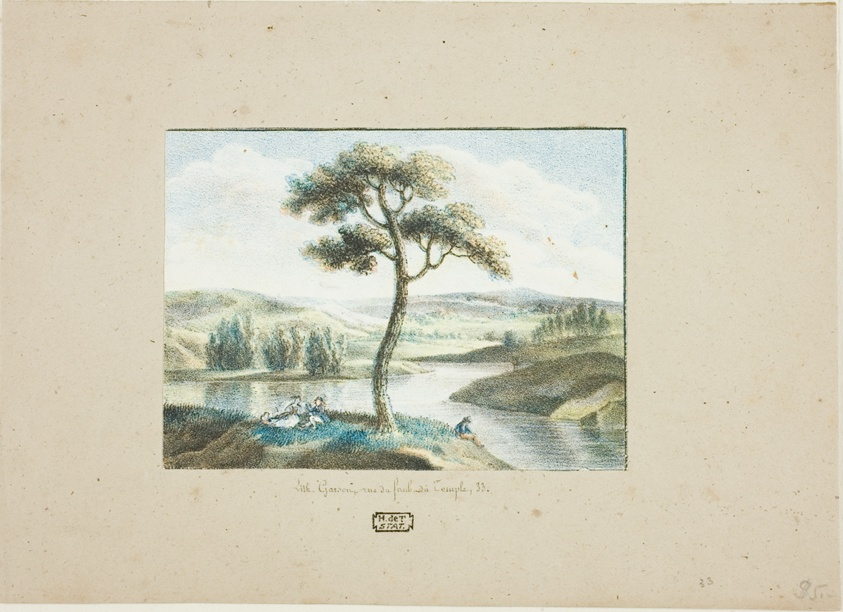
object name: Print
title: Landscape: River and Hills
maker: Victor-René Garson (French, 1796-1850)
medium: Color lithograph on white wove paper, laid down on buff wove paper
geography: France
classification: lithograph; print; prints and drawing